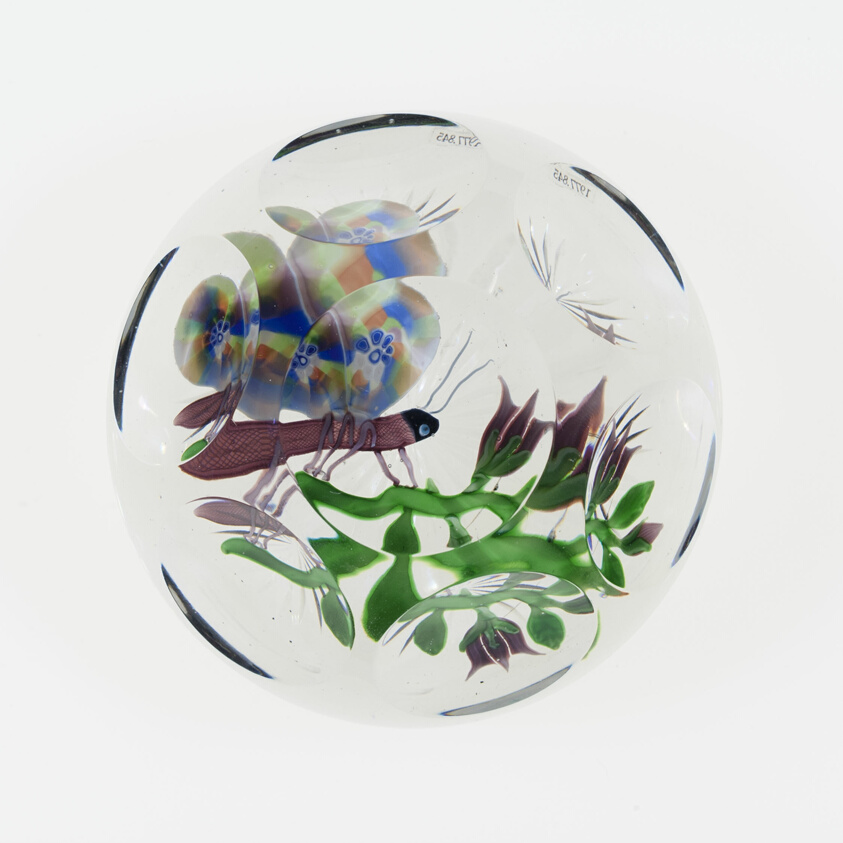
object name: Glass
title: Paperweight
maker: Baccarat Glassworks (Cristalleries de Baccarat); Lorraine, France, founded 1764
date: 19th century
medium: Glass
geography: Lunéville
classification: paperweight; lampwork; european decorative arts; glass